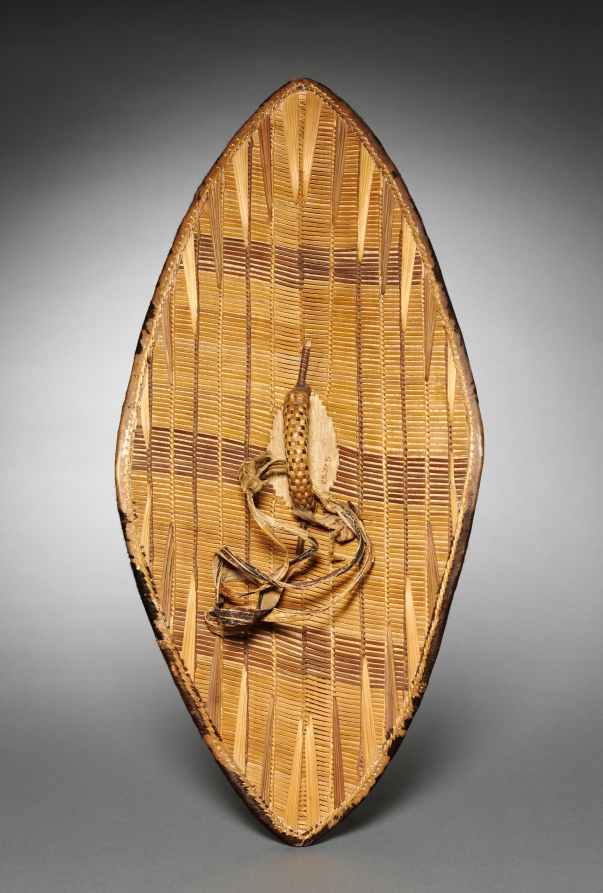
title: Shield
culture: Africa, Uganda/Kenya, unknown maker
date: by 1928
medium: Bamboo, wood, pelt, and plant fiber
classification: Arms and Armor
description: A shield with a similar shape is on the Ugandan coat of arms, adopted in 1962 to mark the country's independence from Great Britain.